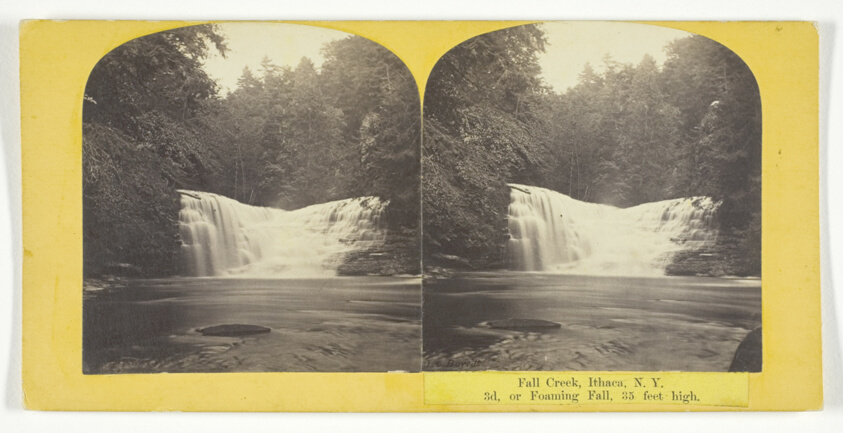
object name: Photograph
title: Fall Creek, Ithaca, N.Y. 3d. or Foaming Fall, 35 feet high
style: 19th century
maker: J. C. Burritt; American, active 1860s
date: 1860/65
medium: Albumen print, stereo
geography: Ithaca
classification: photography; photograph; albumen silver print; stereograph (albumen)